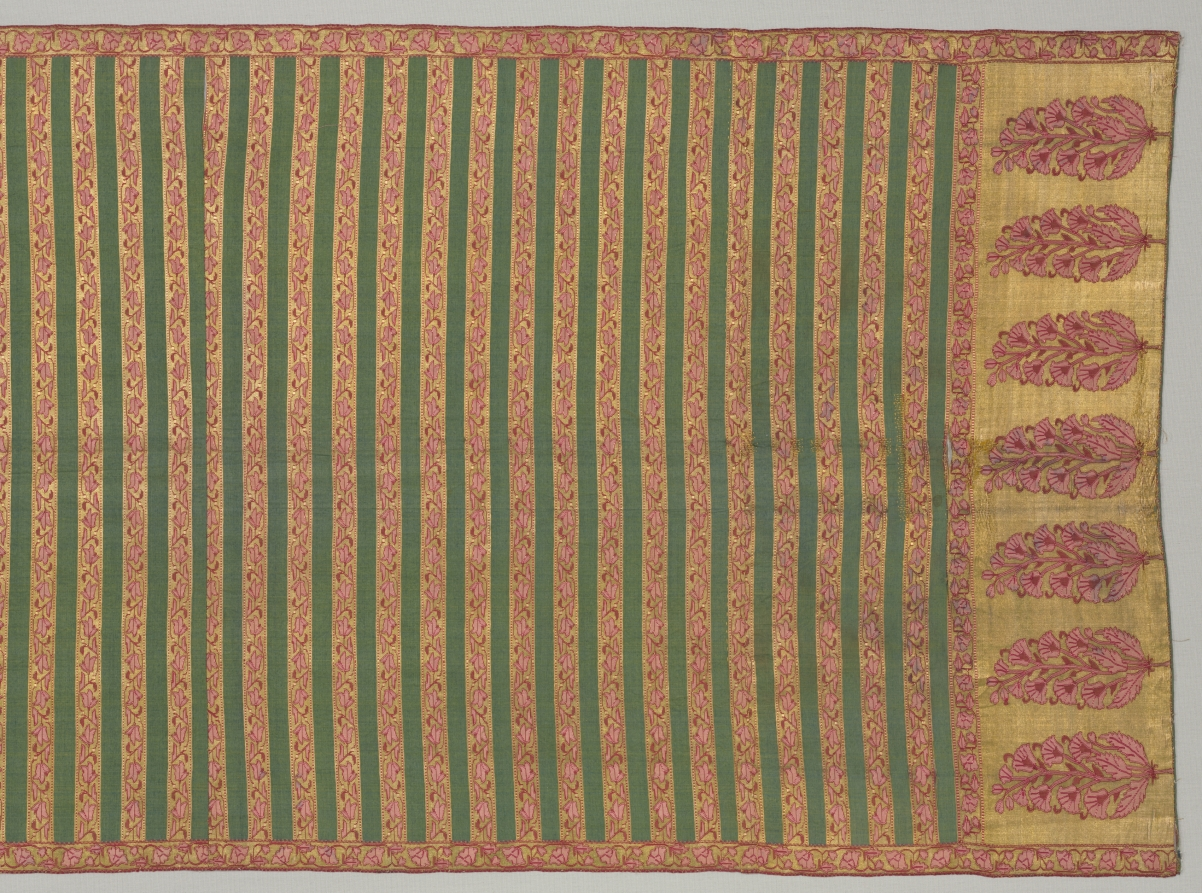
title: Sash with flora and banded field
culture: India, probably Aurangabad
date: 1700s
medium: tapestry weave, double interlocked: silk and gilt-metal thread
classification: Textile